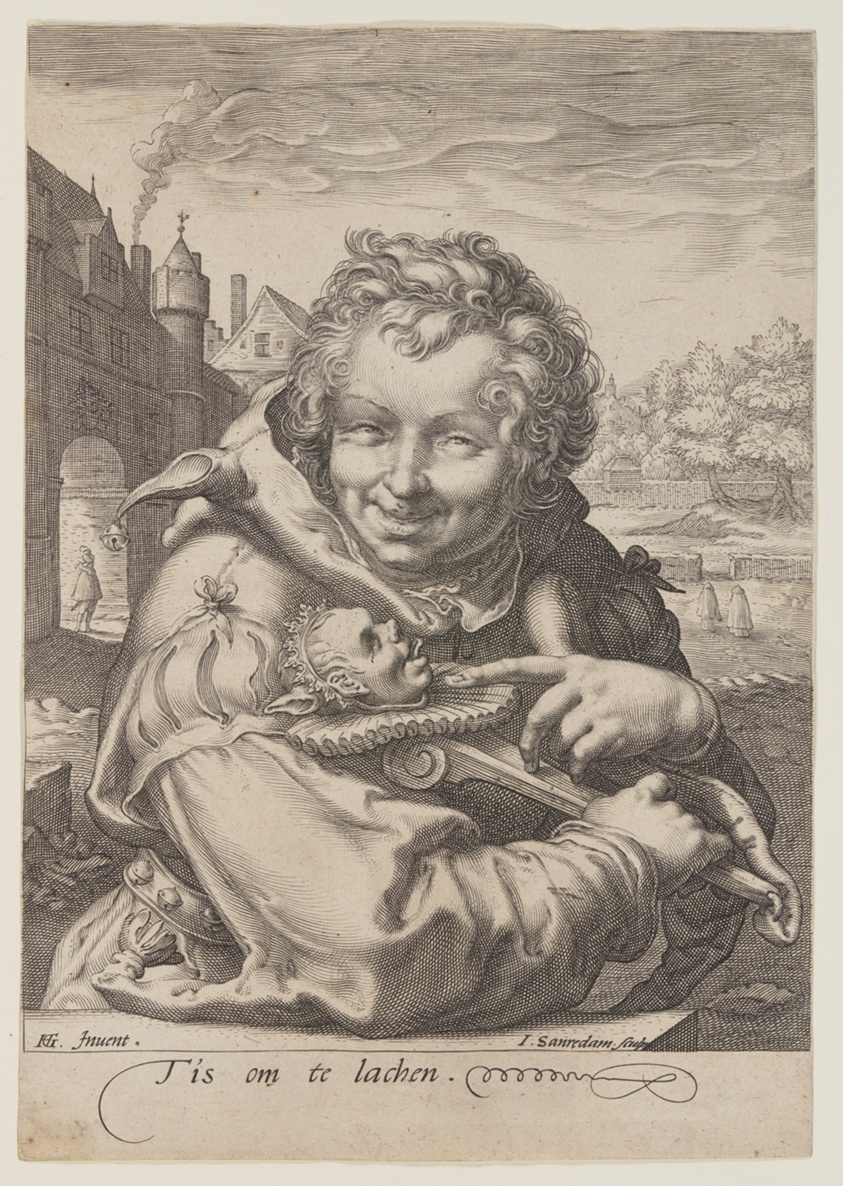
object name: Print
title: Fool Holding a Staff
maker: Jan Saenredam (Dutch, 1565–1607); after Hendrick Goltzius (Dutch, 1558–1617)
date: c. 1595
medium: Engraving on ivory laid paper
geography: Netherlands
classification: engraving; paper; print; prints and drawing